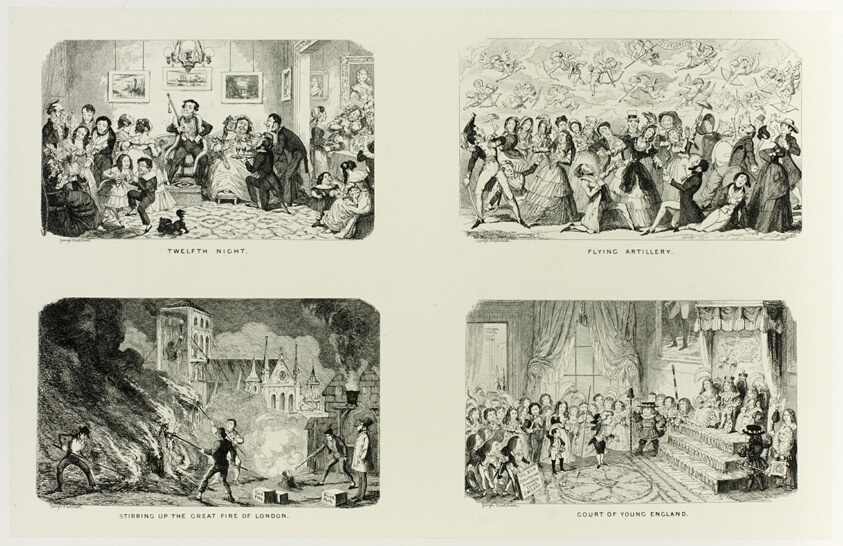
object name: Print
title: Twelfth Night from George Cruikshank's Steel Etchings to The Comic Almanacks: 1835-1853 (top left)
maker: George Cruikshank (English, 1792-1878); published by Pickering & Chatto (English, 19th century)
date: 1845, printed c. 1880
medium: Four steel etchings in black on cream India paper, laid down on off-white card (chine collé)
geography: England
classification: etching; paper; print; prints and drawing